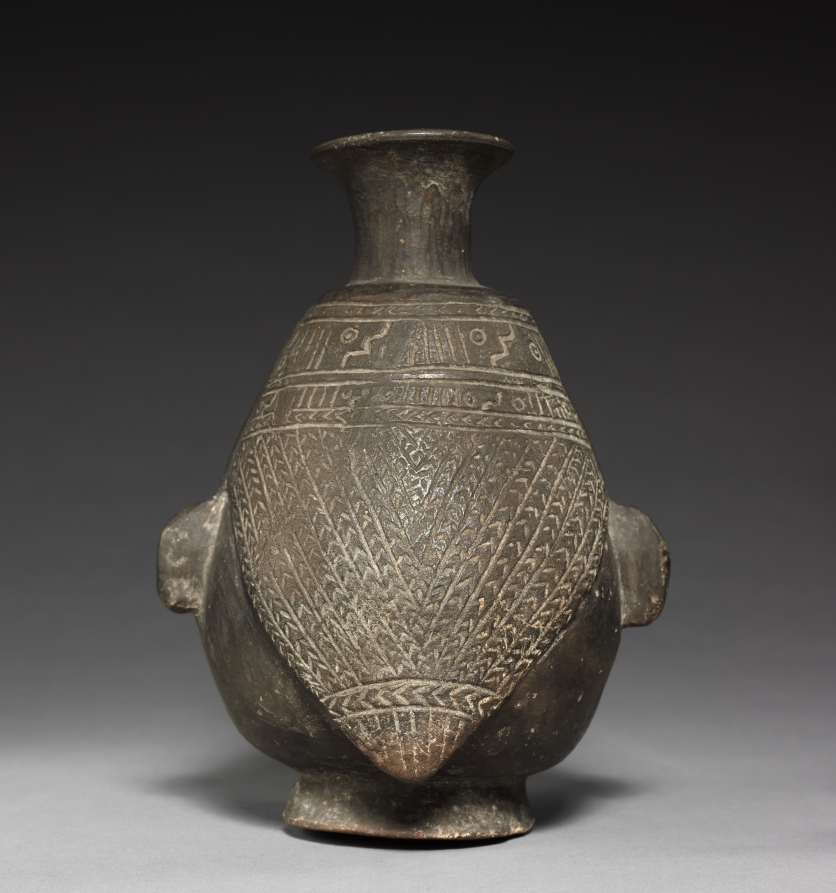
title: Bottle Vase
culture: Peru, Chimú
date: c. 1400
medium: black ware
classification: Ceramic